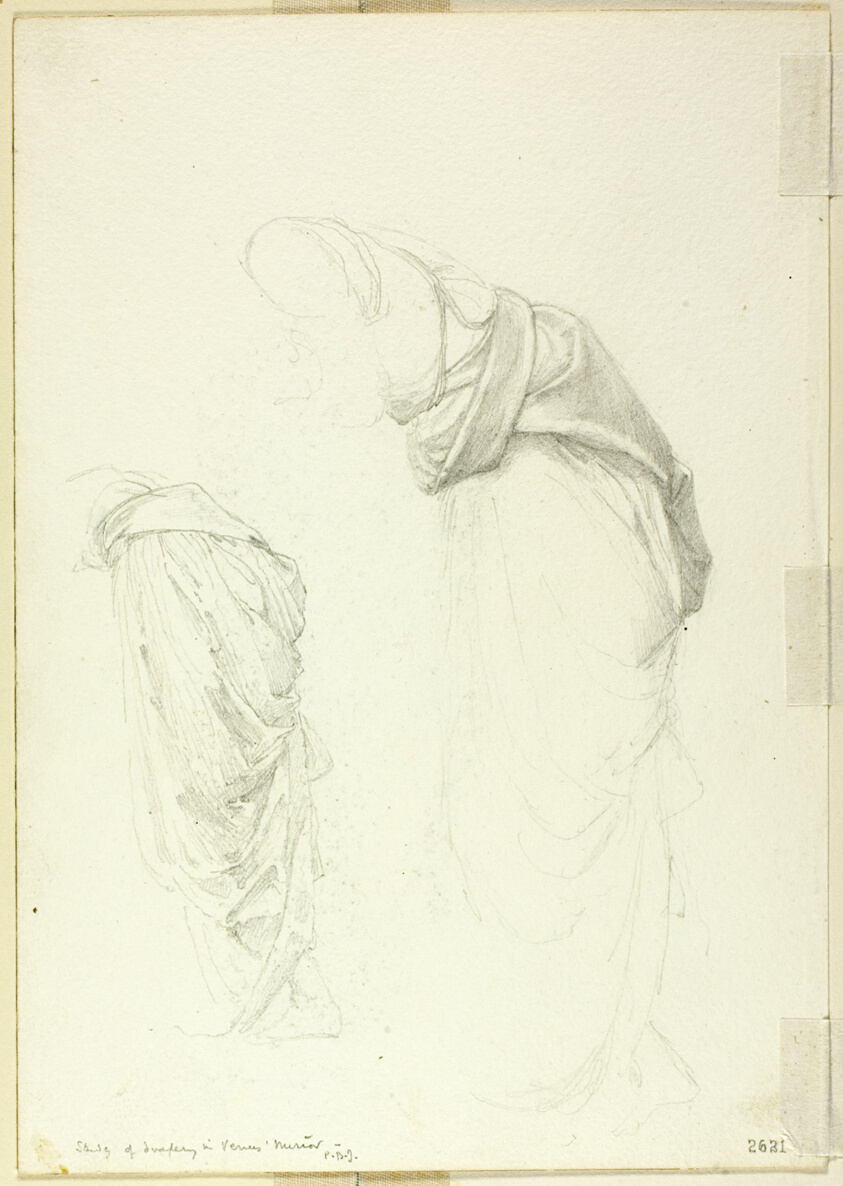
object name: Drawing and Watercolor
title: Drapery, two studies for The Mirror of Venus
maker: Sir Edward Burne-Jones (English, 1833-1898)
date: c. 1873–77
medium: Graphite on ivory wove paper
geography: England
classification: graphite; drawings (visual works); prints and drawing